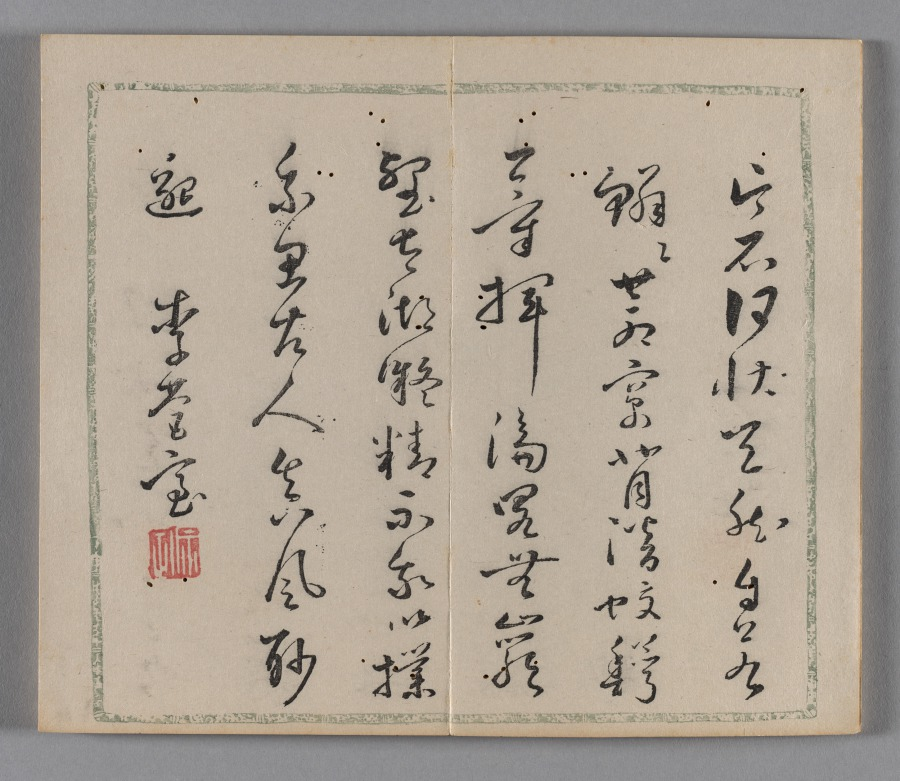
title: Ten Bamboo Studio Collection of Calligraphy and Painting: Round Fans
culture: China, Qing dynasty (1644-1911)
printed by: Hu Zhengyan (Chinese, c. 1584–1674)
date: 1633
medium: Woodblock-printed book; ink and colors on paper; first edition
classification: Print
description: Color printing reached a level of perfection in the early 1600s, as seen in this Ten Bamboo Studio Collection of Calligraphy and Painting and the Mustard Seed Garden Manual of Painting (printed 1679 and 1701). The painterly quality, precision in registering (aligning) the woodblocks, and harmonious colors made them the most successful color print editions in Chinese history. Both editions were printed and compiled in Nanjing, spread nationwide, and had a great impact on the arts in Japan and Korea.